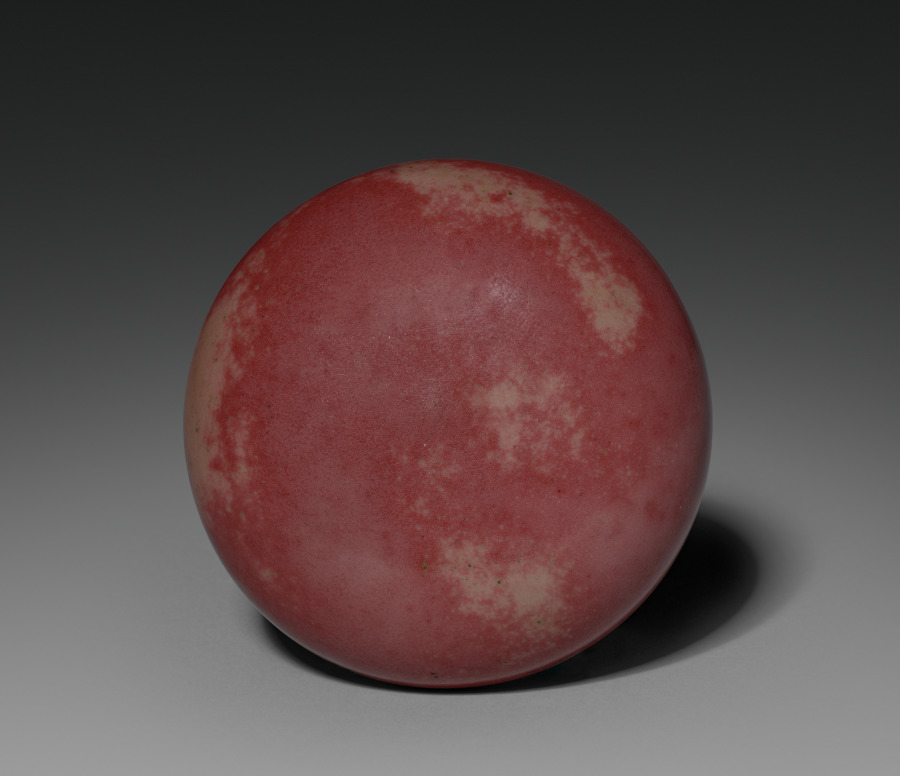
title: Seal Color Box (lid)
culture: China, Jiangxi province, Jingdezhen, Qing dynasty (1644-1911), Kangxi period (1662-1722)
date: 1662–1722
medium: porcelain with "peach bloom" glaze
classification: Ceramic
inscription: 大清康熙年制